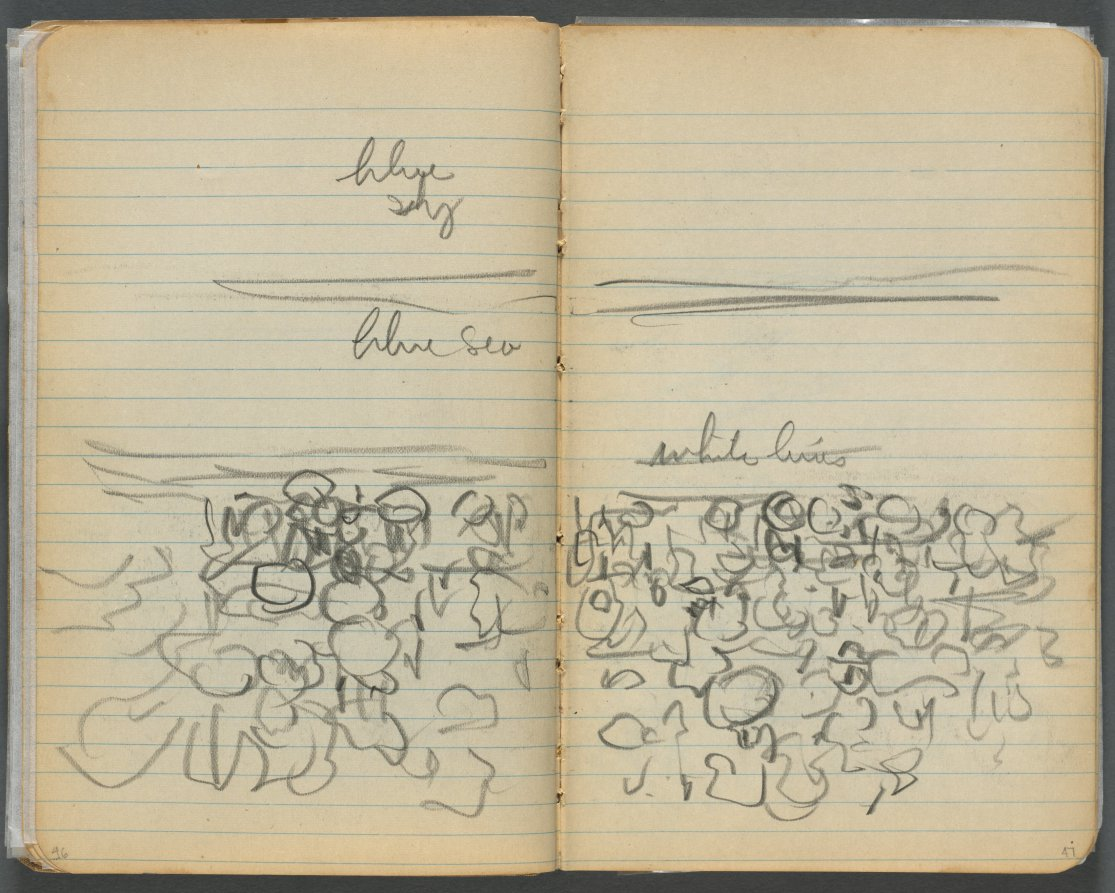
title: Sketchbook, page 046 & 47: Beach View with Color Notations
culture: America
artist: Maurice Prendergast (American, born Newfoundland [now Canada], 1858–1924)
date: 1905–10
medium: graphite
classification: Bound Volume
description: This sketchbook contains 69 pages of drawings, a diary largely devoted to the state of the artist's health, and a three-page discourse on the nature of genius and ideas.